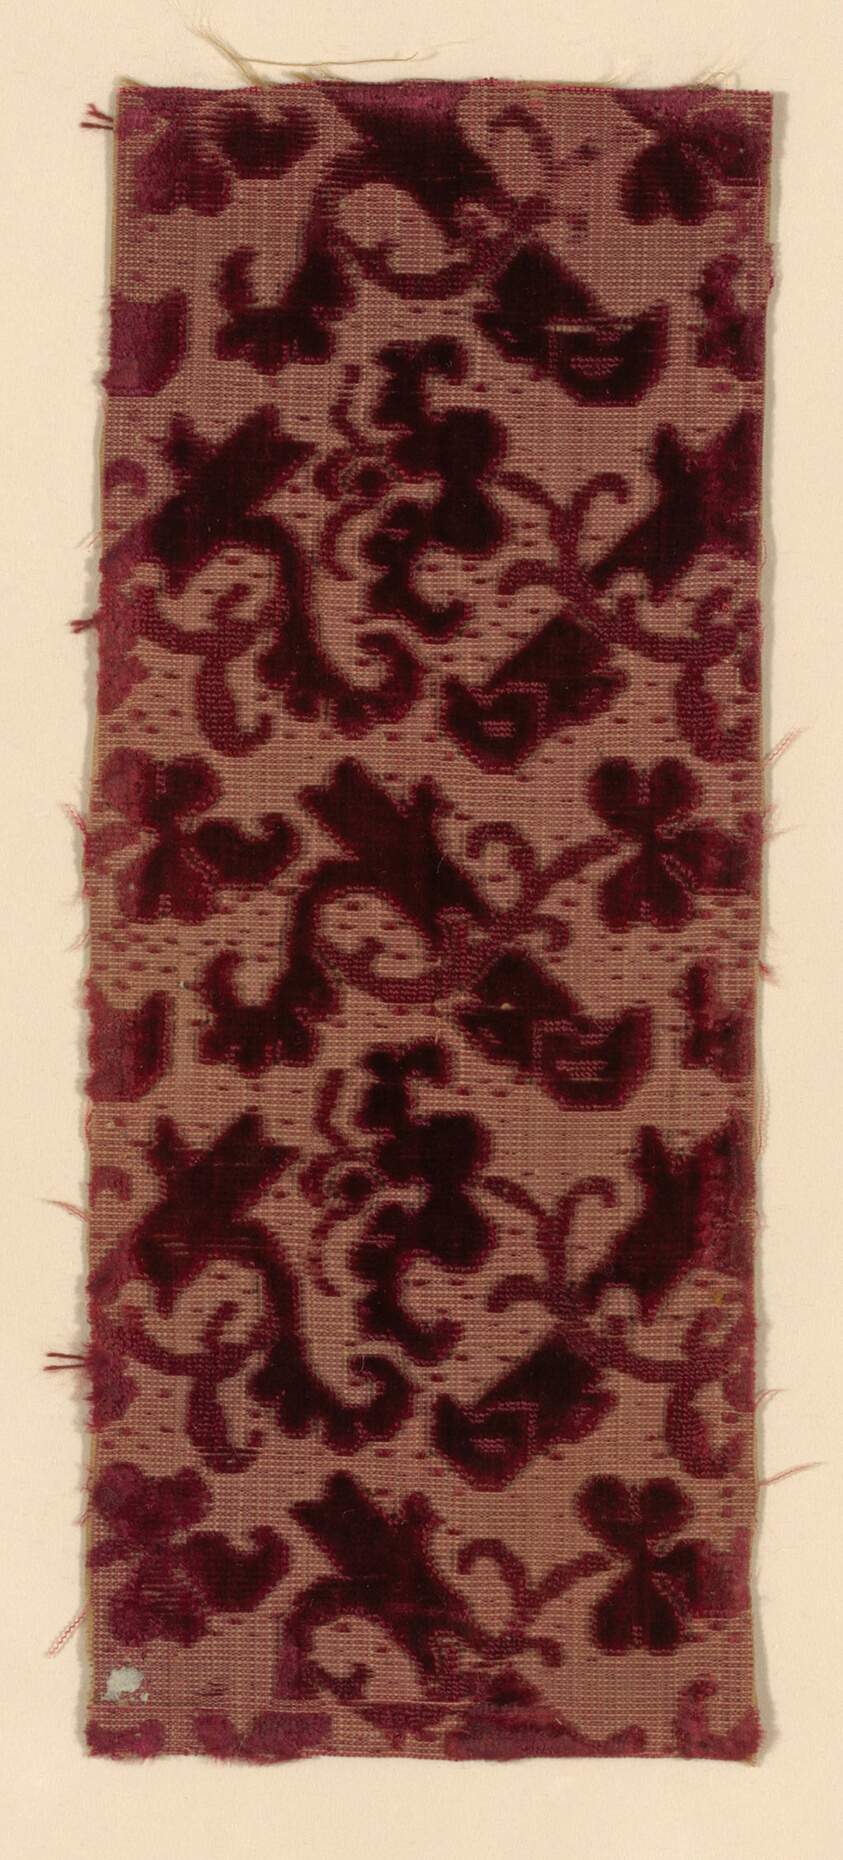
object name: Textile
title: Fragment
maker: Italy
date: 1650/1700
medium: Linen and wool, plain weave with supplementary weft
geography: Italy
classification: textile; weaving - velvet